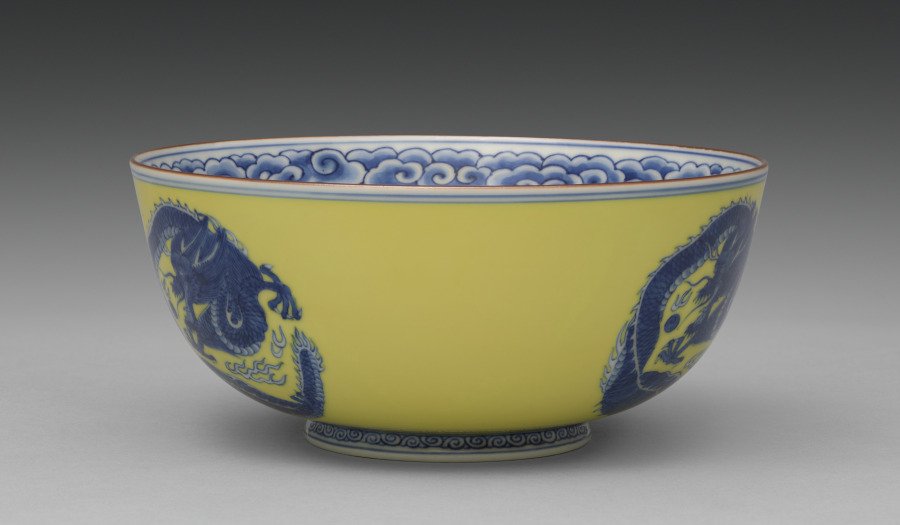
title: Bowl with Dragon Roundels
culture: Japan, Meiji period (1868–1912)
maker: Seifū Yohei III (Japanese, 1851–1914)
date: 1897–1914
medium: Porcelain with underglaze blue, iron oxide, and yellow glaze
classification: Ceramic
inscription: 清風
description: While this bowl has no box, it is attributed to Yohei III based in part on the style of the signature on its base. Below the rim, the bowl’s interior has a ring of clouds in underglaze blue. On the outside, bright yellow is combined with roundels of dragons capturing flaming jewels, painted under the glaze in blue, while the inside has a single dragon roundel in underglaze blue against a white ground. The work’s bold decorative scheme is more in keeping with what might be expected from the high-output studio of Miyagawa Kozan in Yokohama, whose products were designed for mass appeal. A similar bowl is in the collection of the Museum of Ceramic Art, Hyogo.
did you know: Seifū Yohei III was inspired by the Chinese mythical animals and motifs with magical symbolism—including clouds and fungi—that were common on porcelain objects made at Jingdezhen in China during the Ming dynasty (1368–1644) and then exported around the world.